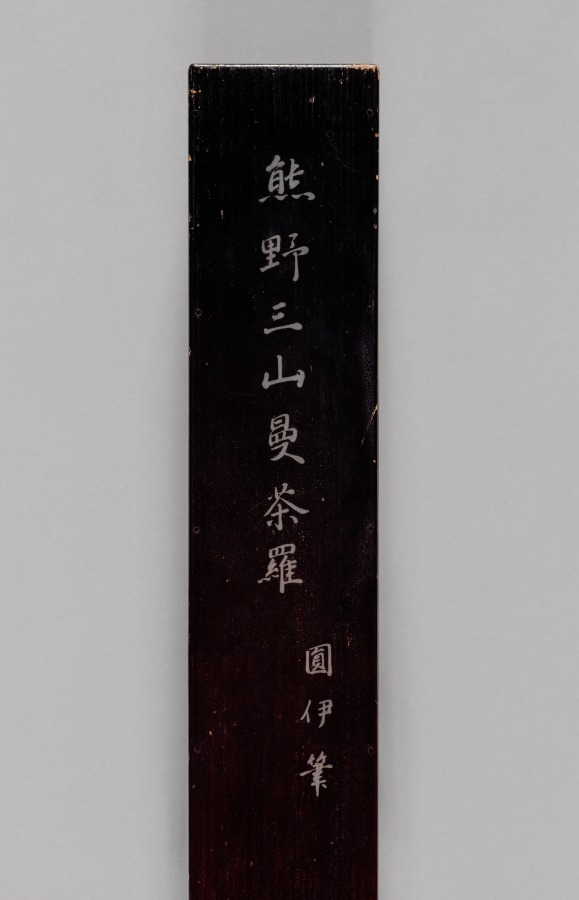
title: Mandala of the Three Shrines at Kumano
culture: Japan, Kamakura period (1185–1333) to Nanbokuchō period (1336–92)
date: 1300s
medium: hanging scroll; ink and color on silk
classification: Painting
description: This painting depicts the three shrines of Kumano from a bird’s-eye perspective, with the Buddhist counterparts of the kami of each shrine hall shown in discs directly above the halls. It also features figures, both pilgrims and deities, along the pilgrimage route and at the shrines. It is the only surviving work illustrating architectural representations of all three shrines in the same painting. They are compressed into a stacked composition, with the Nachi shrine at the top, the Shingū in the middle, and the Hongū at the bottom.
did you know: The sacred waterfall at the top right of the painting is called Nachi.